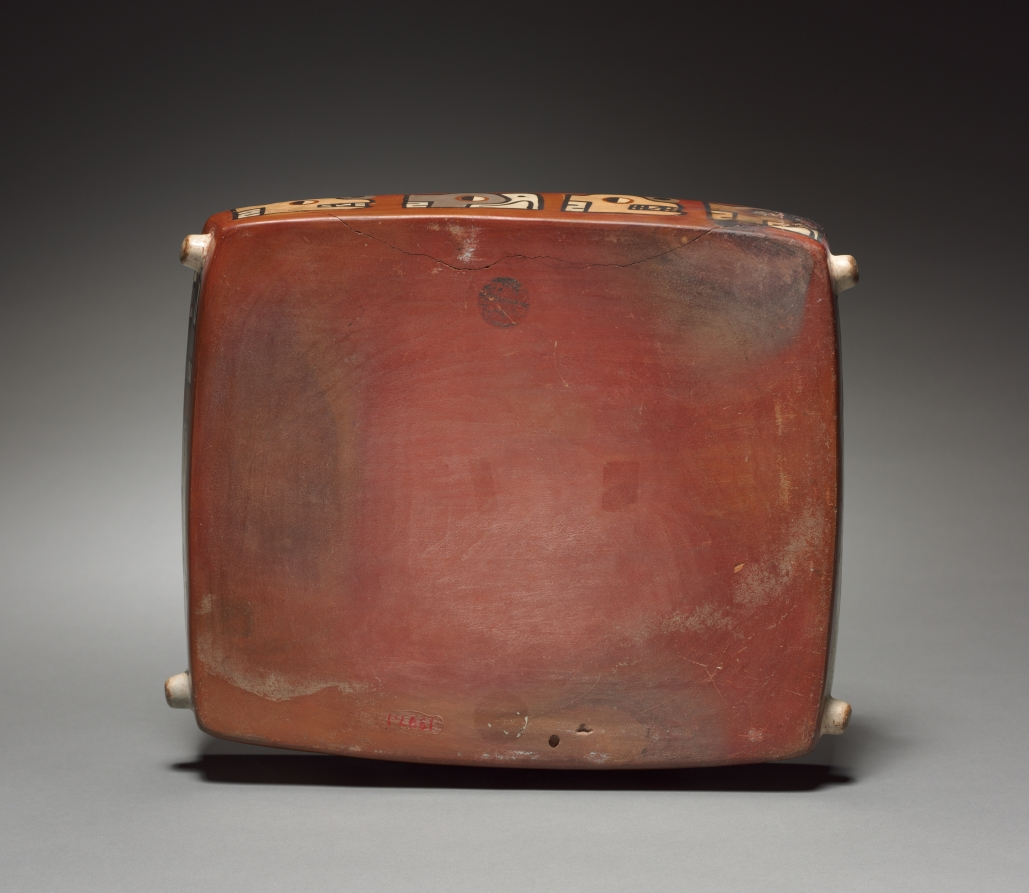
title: Figure in a Litter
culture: Wari (Pachacamac) style, Middle Horizon, Epoch 2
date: 500–900 (Thermoluminescence date, 590–1090)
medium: earthenware with colored slips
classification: Ceramic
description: Whether a deity, ancestral mummy, or masked human, this figure signals power. The divided eyes and fangs are traits of supernatural beings. The hands are cupped around holes that once perhaps held staffs, symbols of human and divine authority. And the litter was a mode of travel reserved for those of high station; the knobs refer to poles that rested on the shoulders of human bearers.